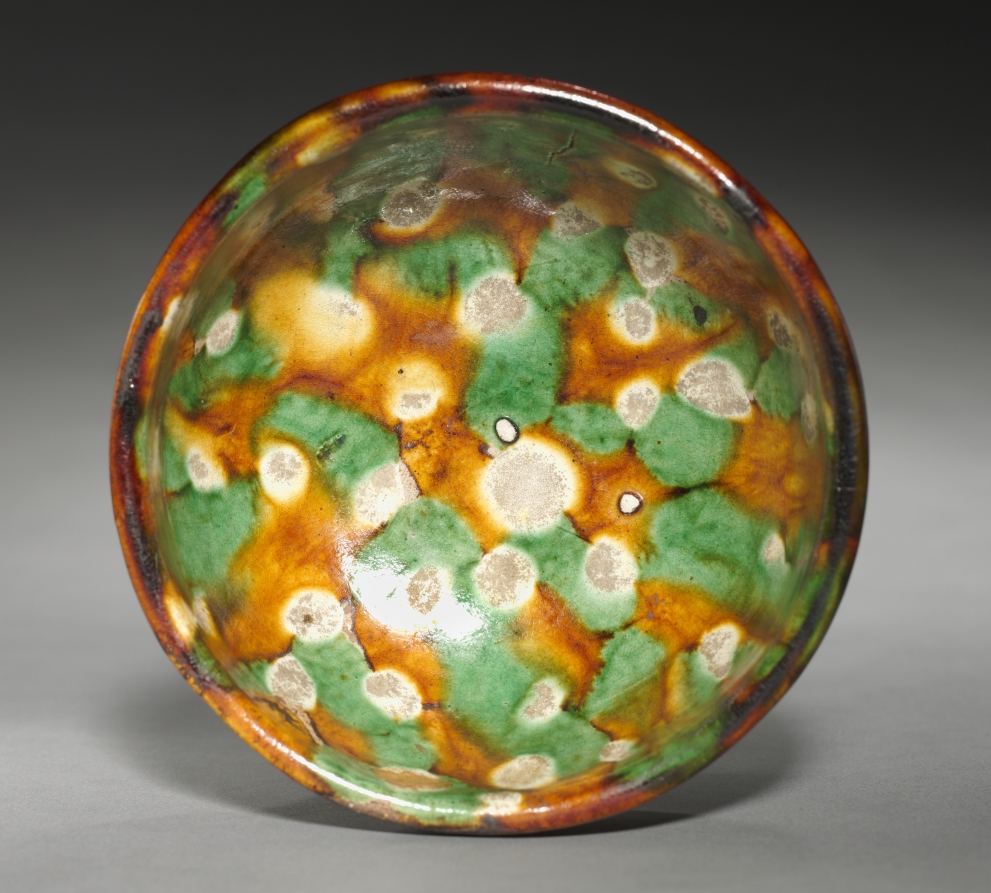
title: Bowl with Bands and Spirals in Relief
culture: China, Tang dynasty (618-907)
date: late 600s–early 800s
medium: glazed earthenware with molded decoration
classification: Ceramic